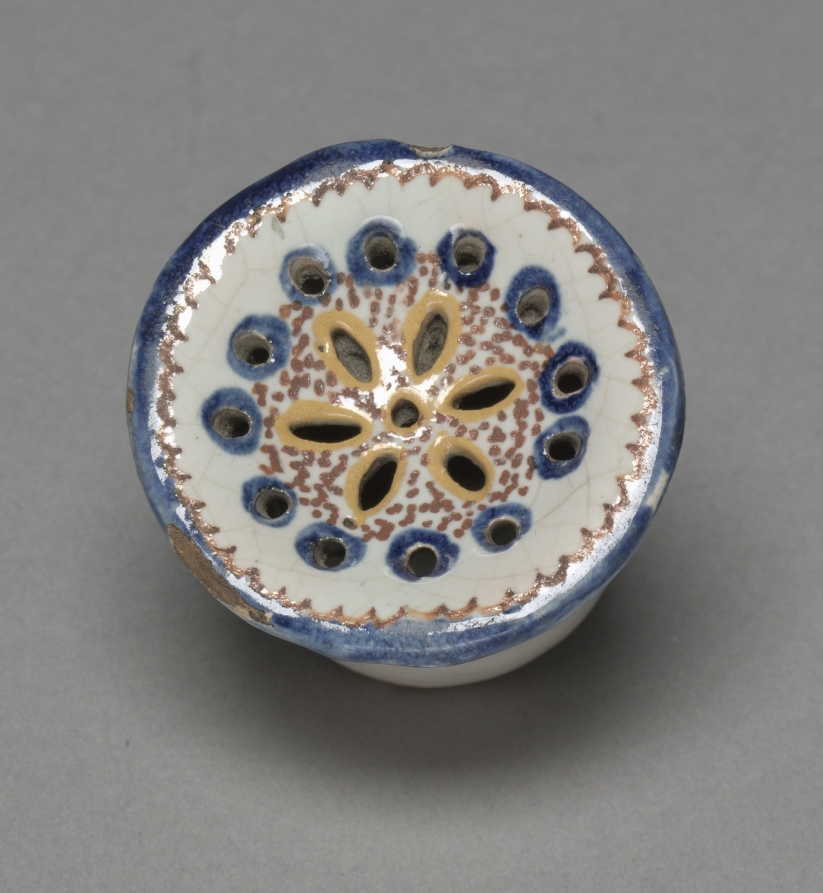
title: Writing Stand with Inkwells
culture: France, Sinceny, 18th century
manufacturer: Sinceny Factory (French)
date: 1746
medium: Tin-glazed earthenware (faience) with enamel decoration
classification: Ceramic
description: The faience factory at Sinceny was an offshoot of that at Rouen. In style, Sinceny closely resembles later Rouen wares with polychrome decoration. The stylized flowers and insects which decorate this writing stand are entirely typical of Sinceny faience.